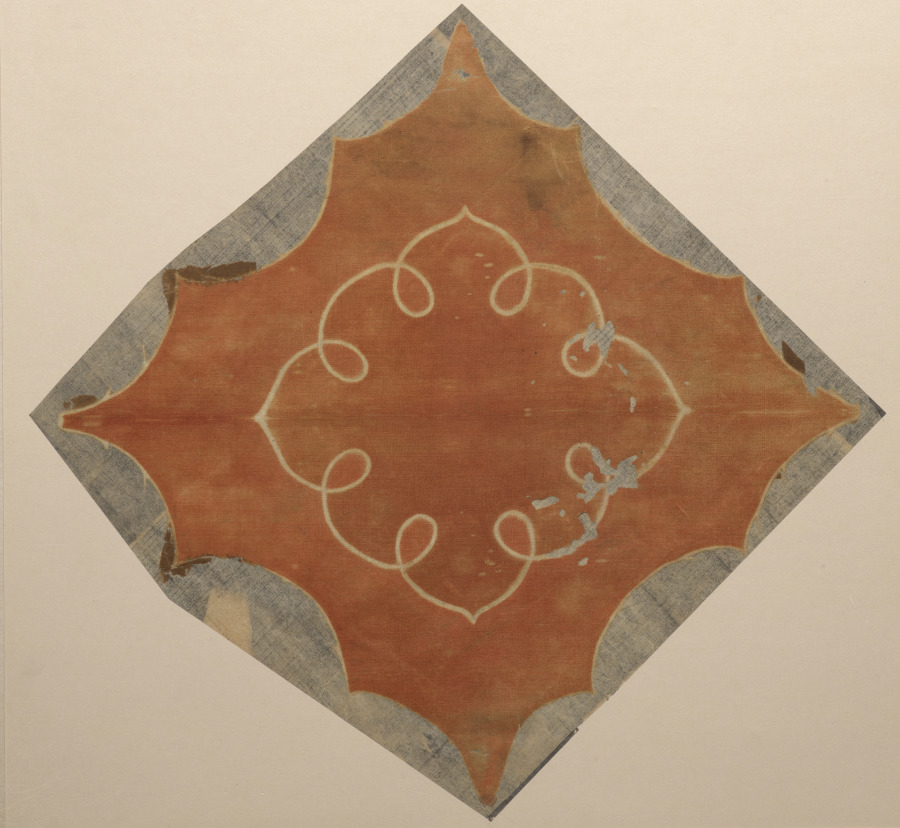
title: Fragment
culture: China or Japan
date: 700s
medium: tabby weave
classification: Textile